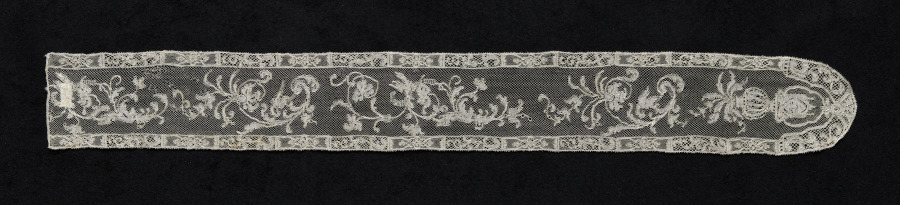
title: Lace Lappet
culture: France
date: 1780s–90s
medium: Silk: bobbin lace (Mechelen blonde lace)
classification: Lace